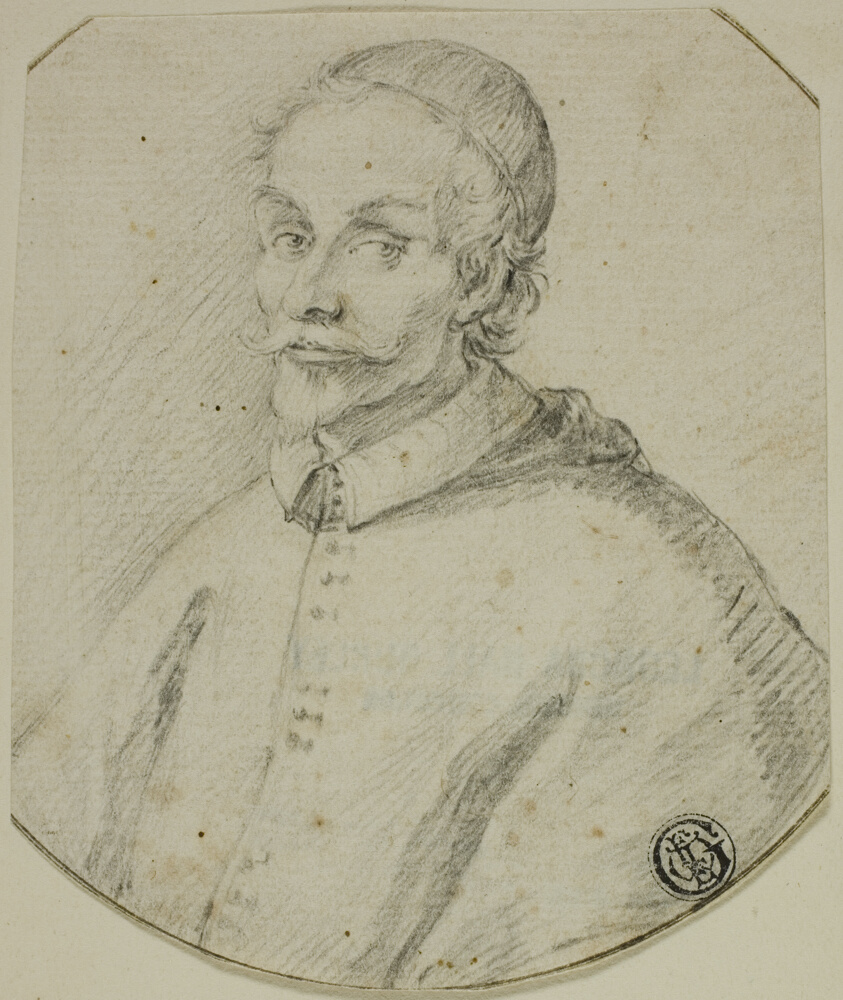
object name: Drawing and Watercolor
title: Portrait Bust of a Cardinal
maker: Style of Claude Mellan; French, 1598-1688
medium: Black chalk on cream laid paper, tipped onto cream wove paper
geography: France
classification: chalk; drawings (visual works); prints and drawing